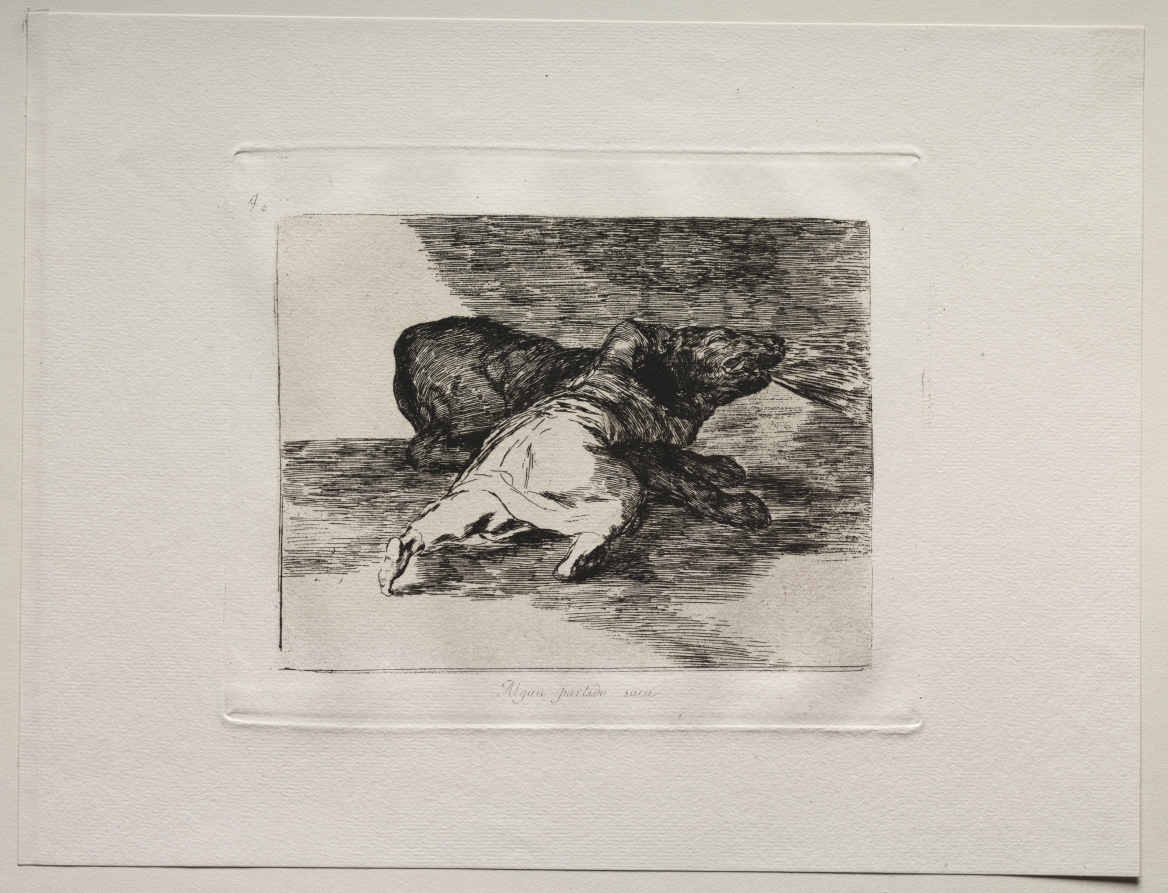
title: The Horrors of War: He Gets Something Out of It.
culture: Spain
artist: Francisco de Goya (Spanish, 1746–1828)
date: c. 1810–20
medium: etching and aquatint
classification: Print